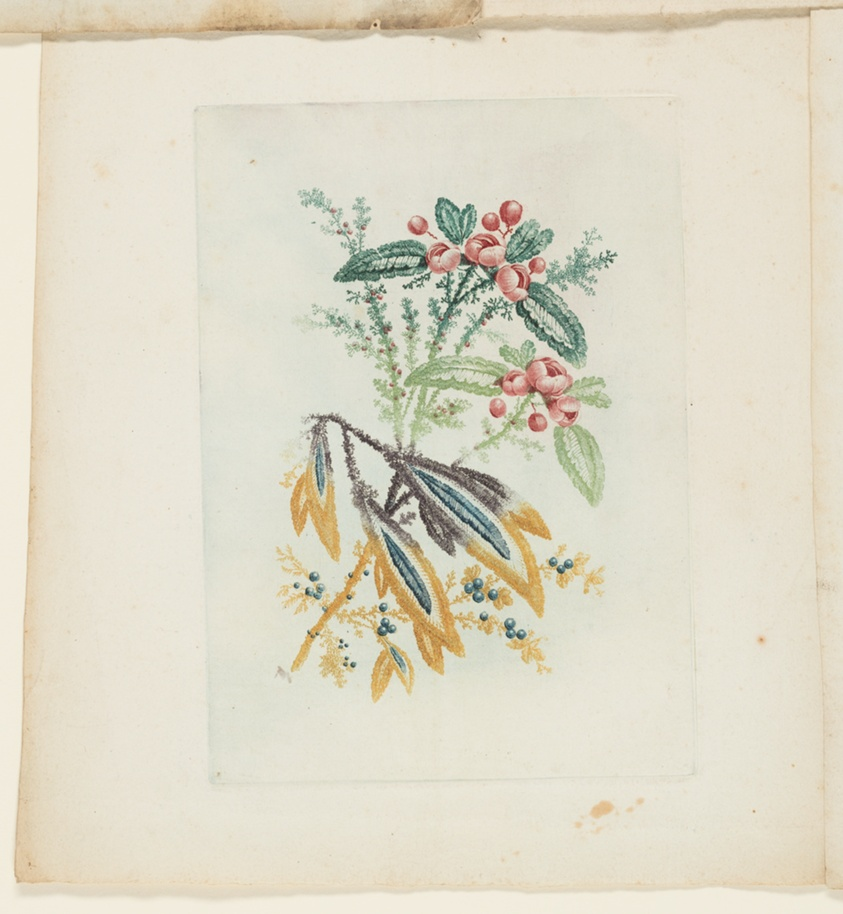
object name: Print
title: Plate, from New Suite of Notebooks of Ideal Flowers for Use by Draftsmen and Painters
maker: Anne Allen (English, active 1790s); after Jean-Baptiste Pillement (French, 1728-1808)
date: c. 1795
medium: Color etching with à la poupée inking on blue laid paper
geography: England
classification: etching; print; prints and drawing